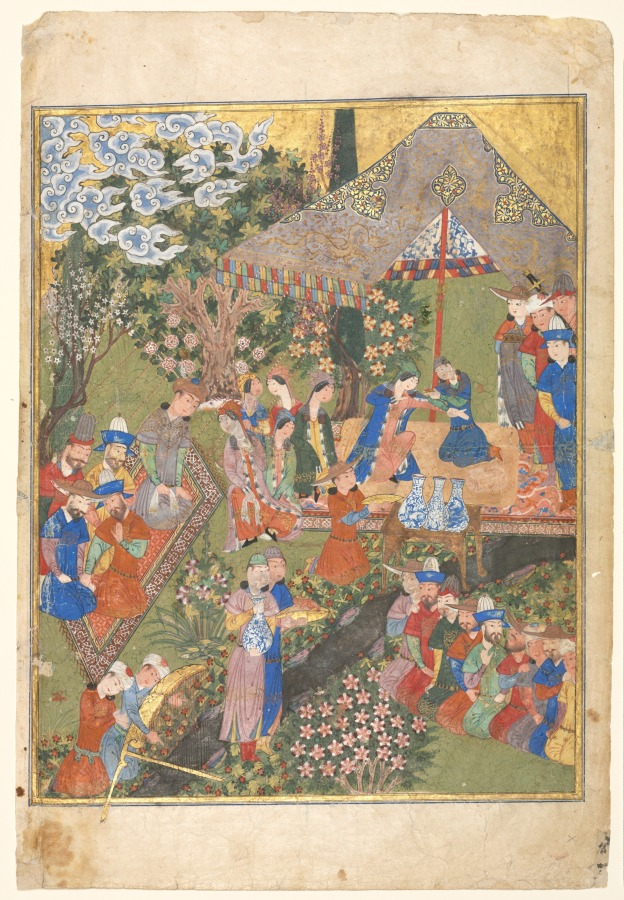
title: Royal Reception in a Landscape, right folio from a double-page frontispiece of a Shahnama (Book of Kings) of Firdausi (940–1019 or 1025)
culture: Iran, Shiraz, Timurid period (1370-1501)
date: 1444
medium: opaque watercolor, gold, and silver on paper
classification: Manuscript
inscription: Yā kabīkaj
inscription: Recto: Effaced seal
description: The painting on the verso of this folio is the first half of a double-page frontispiece now detached from a Shah-nama manuscript (see CMA 1956.10 for the second half of the frontispiece). The scene does not illustrate a narrative from the Shah-nama, but is likely a representation of the courtly audience for whose entertainment the manuscript was created. The date and style of the painting indicate that it was made during the reign of the Timurid dynasty in Shiraz, Iran.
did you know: Seemingly uninterested in the emissaries and gifts, a prince kneels with six royal women under an open tent and tries to coax one to have a drink.